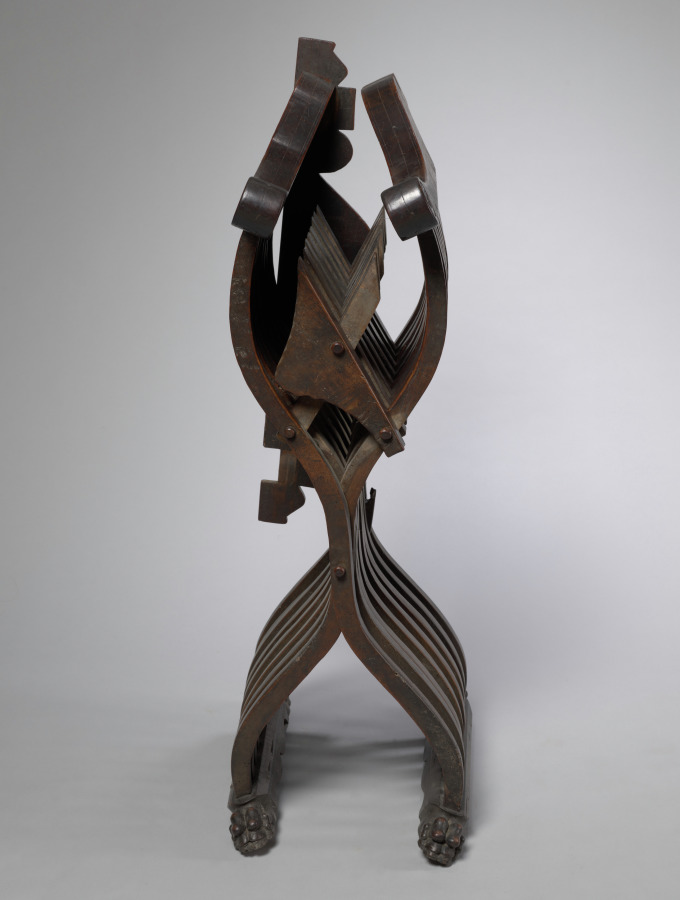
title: Folding Armchair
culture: Italy, early 16th century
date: early 1500s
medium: walnut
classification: Furniture and woodwork